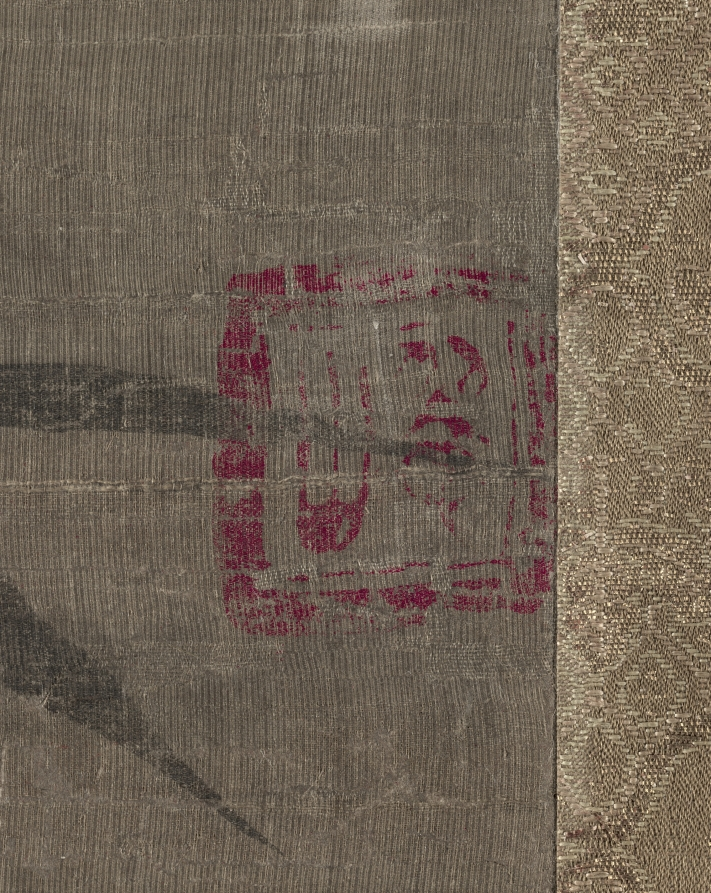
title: Bamboo in Four Seasons: Spring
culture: China, Yuan dynasty (1271-1368)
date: 1279–1368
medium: hanging scroll, ink on silk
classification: Painting